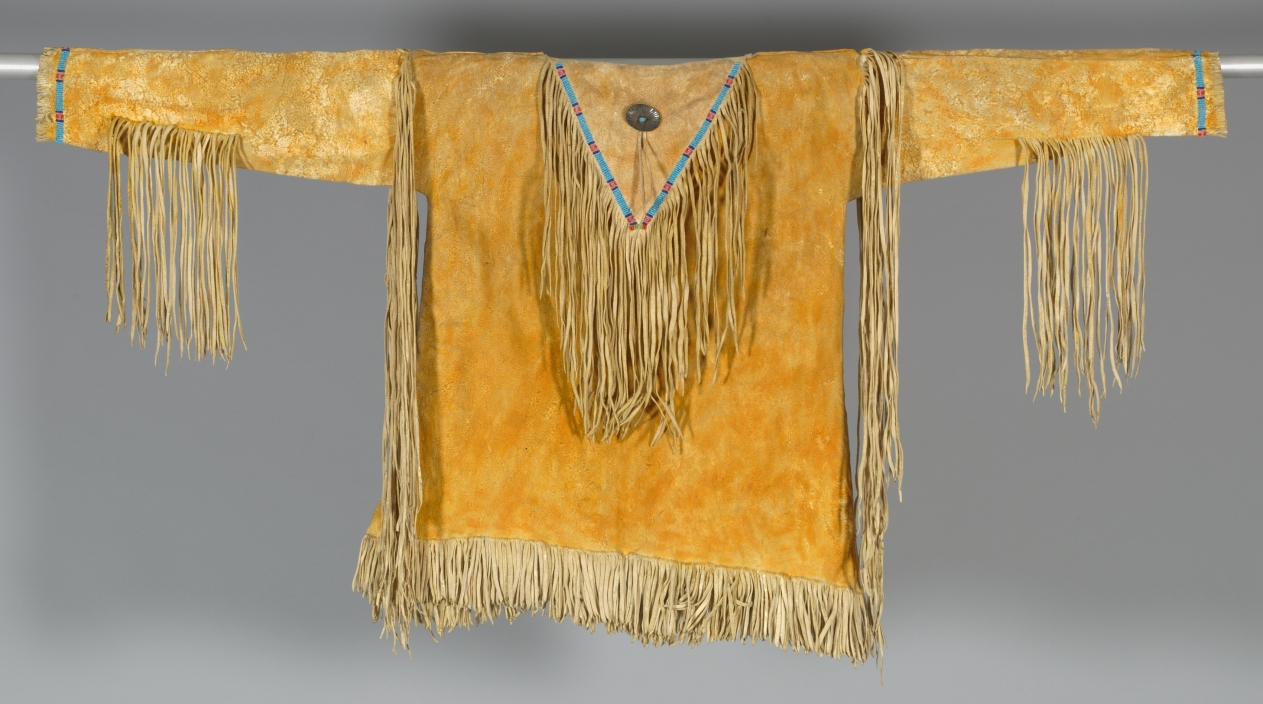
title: Beaded Shirt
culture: America, Native North American, Plains, Gaigwu (Kiowa), Post-Contact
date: late 1800s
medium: beaded leather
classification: Garment